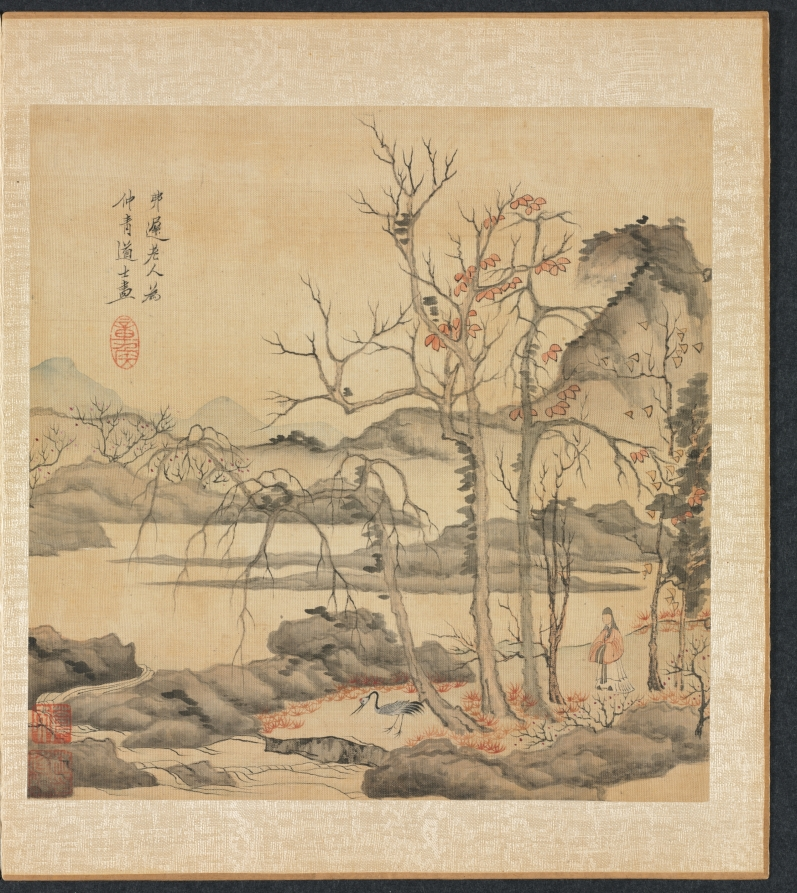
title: Paintings after Ancient Masters: Daoist and Crane in Autumn Landscape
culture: China, Ming dynasty (1368–1644)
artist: Chen Hongshou (Chinese, 1598/99–1652)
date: 1598–1652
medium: album leaf; ink and color on silk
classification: Painting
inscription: The old man Fu-ch'ih painted for the Taoist Chung-ch'ing. [Seal] Chang-hou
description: The twenty paintings in this double-album by Chen Hongshou include landscapes, figures, and flowers. It also has one leaf featuring a woman, an often-used subject not found in the other albums from the latter part of his career. His late works are wonderful summations of Chen's peculiar and quirky art--archaistic, hyper-refined--but without accompanying shallowness or sentimentality. His figures and landscapes in the late albums are miniaturized, not unlike the small Chinese gardens, or the carefully selected small table rocks or old roots used for contemplation to see the world in miniature. This loss of scale is quite deliberate and reflects the psychological situation of a depressed class like the Ming loyalist officials and scholars, deprived of their integrity and honor, and forced to lead a diminished and restricted existence.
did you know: In Chinese culture, cranes are often associated with Daoism and immortality.